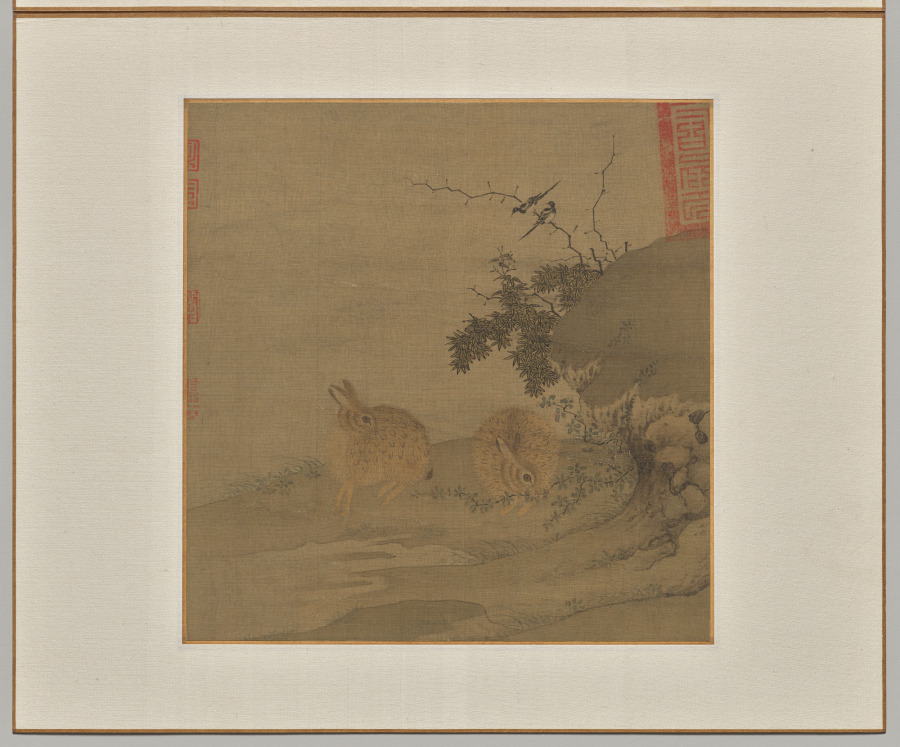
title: Magpies and Wild Rabbits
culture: China, Song dynasty (960-1279)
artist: Li Yong (Chinese, active 1200s)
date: 1200s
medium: album leaf, ink and light color on silk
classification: Painting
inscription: 1 official seal of Ming Dynasty.